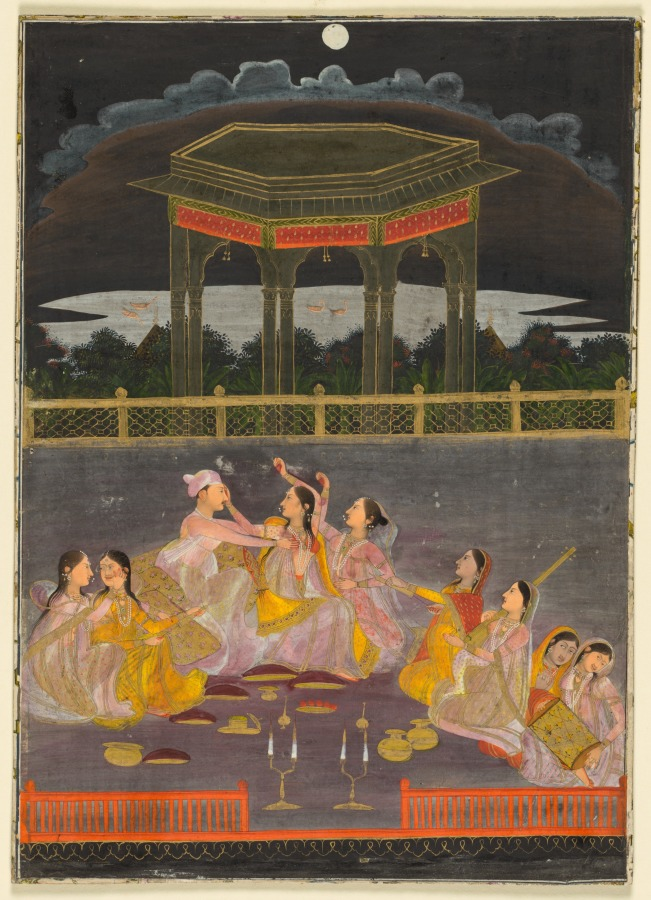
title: A prince celebrating Holi with palace women on a terrace at night (recto); calligraphy of a quatrain (verso)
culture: India, Farrukhabad, Mughal, 18th century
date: c. 1760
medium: Gum tempera, ink, and gold on paper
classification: Painting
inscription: verso: Persian verse in nasta‘liq script: Your eyes have shed so much blood in the world at large/ That around your home corpses are strewn together in disorderly piles./ A hundred thousand faces were cast into molds of loveliness and beauty/ But rarely came out stamped as comely as you.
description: Images of pleasure and play abound in Mughal paintings of the latter half of the 1700s. Under a full moon reflected off a river and by the light of candles, a prince celebrates the spring festival of Holi with a group of palace women. Holi festivities include the boisterous tradition of smearing one another with colored powders—shown heaped on dishes—or shooting colored liquid using plunger guns.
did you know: Pairs of ducks swim under the full moon on the night of the vernal equinox.